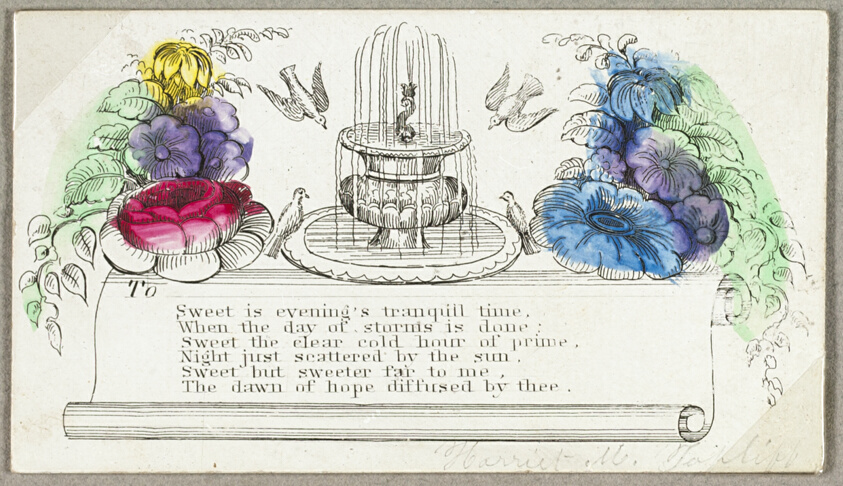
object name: Print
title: Sweet is Evening's Tranquil Time (valentine)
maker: Unknown Artist; American or English, 19th century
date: c. 1830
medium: Engraving with hand-coloring on ivory card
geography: United States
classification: valentine; prints and drawing; print